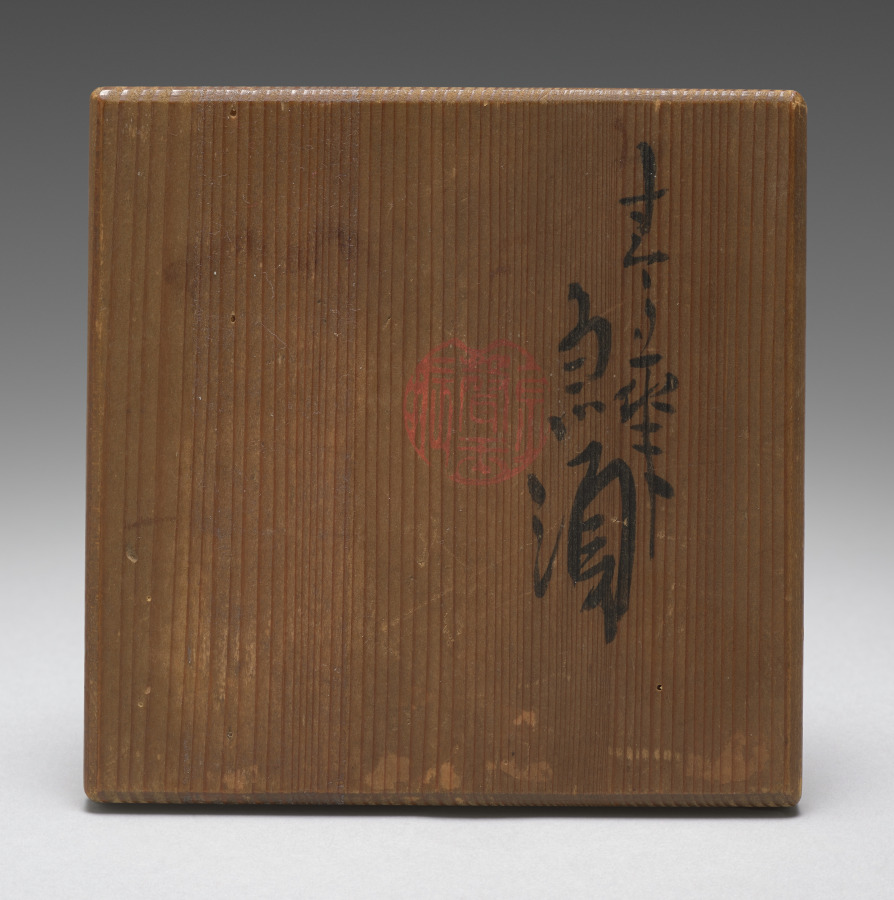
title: Tea Set with Orchids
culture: Japan, Meiji period (1868–1912)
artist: Seifū Yohei III (Japanese, 1851–1914)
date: c. 1893–1914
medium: Teapot with set of five teacups; porcelain with underglaze blue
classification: Ceramic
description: Although the teapot here is stored in a separate box from the five cups, these six pieces may once have been part of a tea set that included other tools such as a water cooler. The teacups have orchid flowers on both sides in underglaze blue, as well as a blue band inside the footring. The teapot has the same design and a blue band painted around the bottom of the lid’s knob. The cups’ long wood storage box is stamped on the exterior, over the lid and base, with a small red seal reading “Satō.” The same seal appears on five small squares of yellow textile, one placed in the bottom of each compartment in the teacup storage box. These are additional to the customary yellow cloths stamped with a “Seifu” seal. Interestingly, four of the Seifū cloths are stamped with an ovoid seal, while the remaining cloth, which is a slightly lighter color, has an unusual seal that is not quite gourd-shaped and with the fū of Seifū in a stylized, unrecognizable form. The teapot has its own box with a Satō seal and is wrapped with an orange textile stamped with the same unusual Seifū seal. A set with a very similar surface design is in the Brooklyn Museum. The Brooklyn set has a water cooler and a small pitcher, in addition to the teapot and cups, and all are in a single storage box. This box records the tea tools as made with kanpakuji, or “bright-jewel white porcelain,” counted among Yohei III’s most important inventions, and carved images. In fact, both sets have a white surface much closer in coloration to the cool white of porcelain clay used in Kyoto at the time, and the designs are simply painted. The Brooklyn set was thus likely mismatched at some point with a box intended for another tea set. Nonetheless, the box may have helped prevent the set’s original components from being dispersed, and the set itself provides insight into how the other tools from the present set may have looked.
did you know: This tea set with orchids has a side-handled pot called a kyūsu, used for steeping, straining, and serving tea.